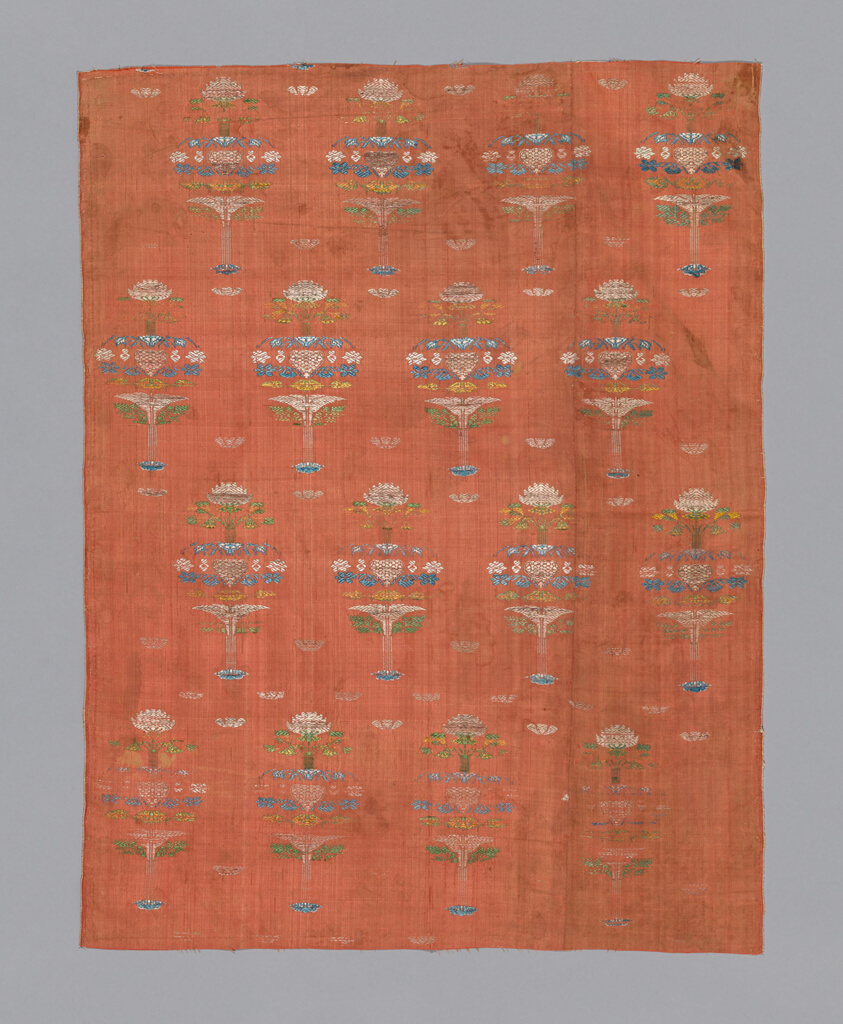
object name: Textile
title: Silk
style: isfahan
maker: Iran (Persia, Isfahan)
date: 1650/1700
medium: Persian silk. Ispahan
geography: Iran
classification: textile; weaving